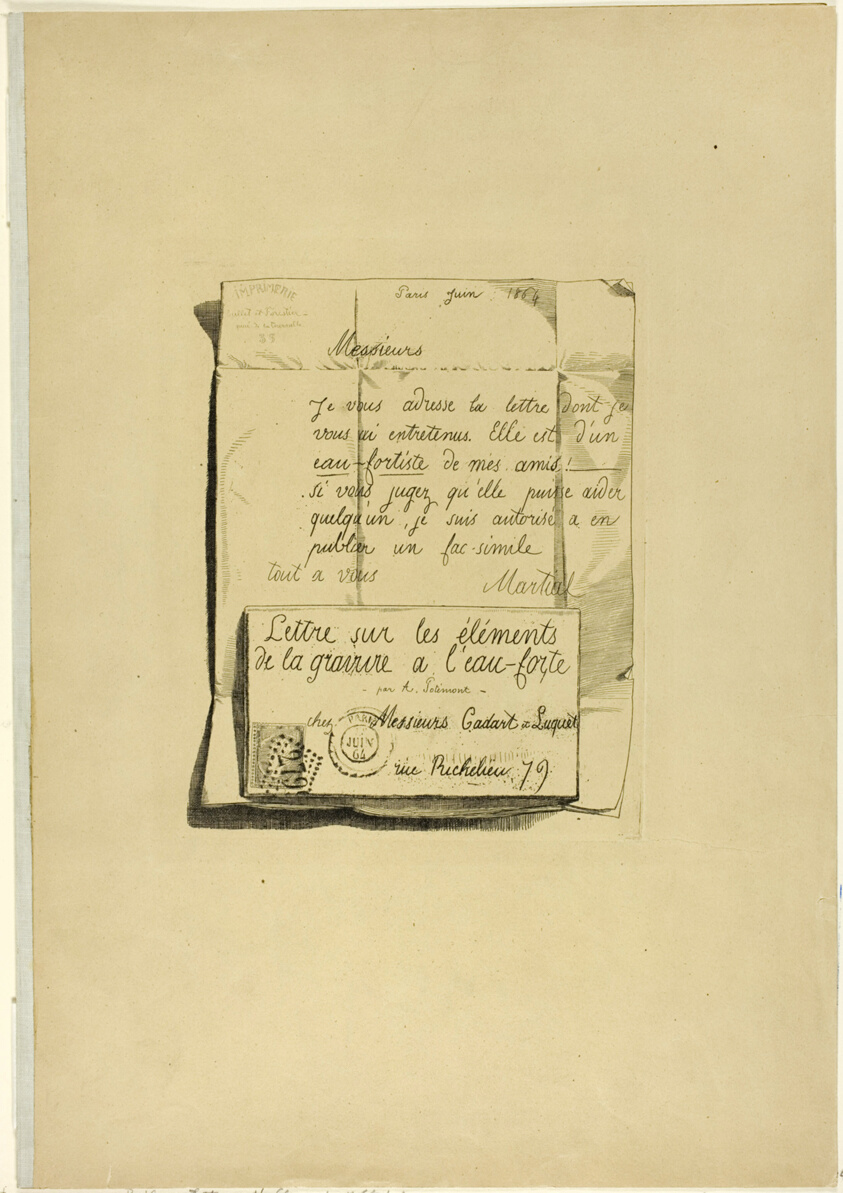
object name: Print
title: Letter on the Elements of Etching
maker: Adolphe Martial Potémont (French, 1828-1883); published by Editeurs Cadart & Luquet (French, 19th century); printed by Imprimerie Bullet et Forestier (French, active 19th century)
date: 1864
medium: Etching and drypoint on tan wove paper, folded in half to make a cover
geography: France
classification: etching; print; prints and drawing